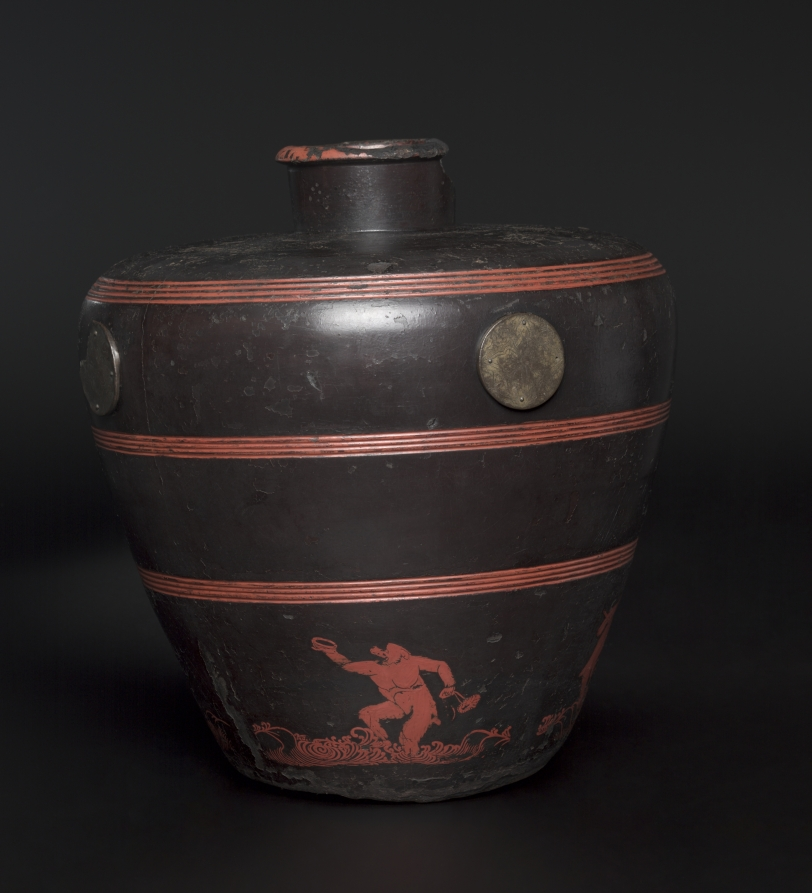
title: Jar with Scenes of Frolicking Xingxing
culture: Japan, Kamakura period (1185–1333)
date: 1302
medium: Zelkova wood, covered with hemp cloth and colored lacquer, and bronze-plated wood fittings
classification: Lacquer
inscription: Dated 1302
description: This jar features a design of a monkey-like animal ladling sake into his mouth from a vessel bobbing in waves, along with others trying on sandals and crossing a river. In the 1300s, Chinese literature was a powerful source of inspiration for artistic practice in Japan, and this scene was inspired by the exploits of the mythical xingxing, a beast of ancient Chinese lore for whom people left straw sandals and wine. The xingxing would then recite the names of the ancestors of those who had left them the gifts.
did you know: To make this vessel, a wooden form was covered with successive layers of lacquer, the clear sap of the highly toxic Rhus verniciflua tree.